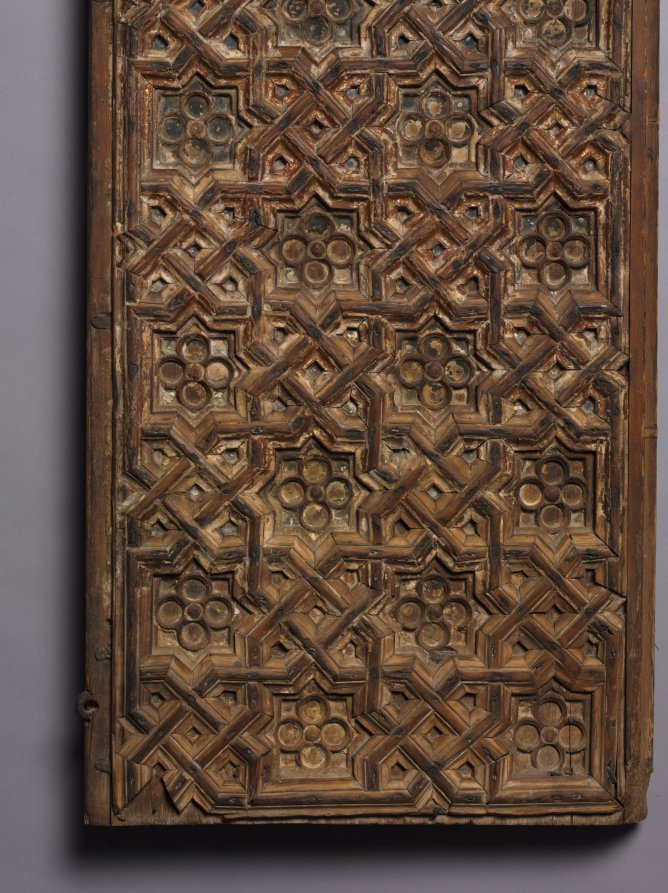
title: Door (left)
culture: Spain, early 15th century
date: early 1400s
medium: gilded and painted wood (pine)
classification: Furniture and woodwork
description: Typical of Muslim-inspired ornamentation, these doors reflect a love of geometric decoration stemming from a non-realistic artistic tradition. They consist of applied wood strips that form eight-point stars, flowers, and geometric interlace designs. Such designs are reflected in the tiles, ceramic vessels, and metalwork of Muslim-occupied Spain. The origin of the doors is not known, but they may have belonged to a palace or domestic residence. In 711, the Moors had invaded and conquered nearly the entire peninsula. During the next 750 years, independent Muslim states were established, and the entire area of Muslim control became known as Al-Andalus. Muslim philosophers and scientists developed knowledge in areas like medicine, optics, algebra, chemistry, and geometry, as seen here. Typical of Muslim-inspired ornamentation, these doors reflect a love of geometric decoration stemming from a non-realistic artistic tradition. They consist of applied wood strips that form eight-point stars, flowers, and geometric interlace designs. Such designs are reflected in the tiles, ceramic vessels, and metalwork of Muslim-occupied Spain. The origin of the doors is not known, but they may have belonged to a palace or domestic residence.